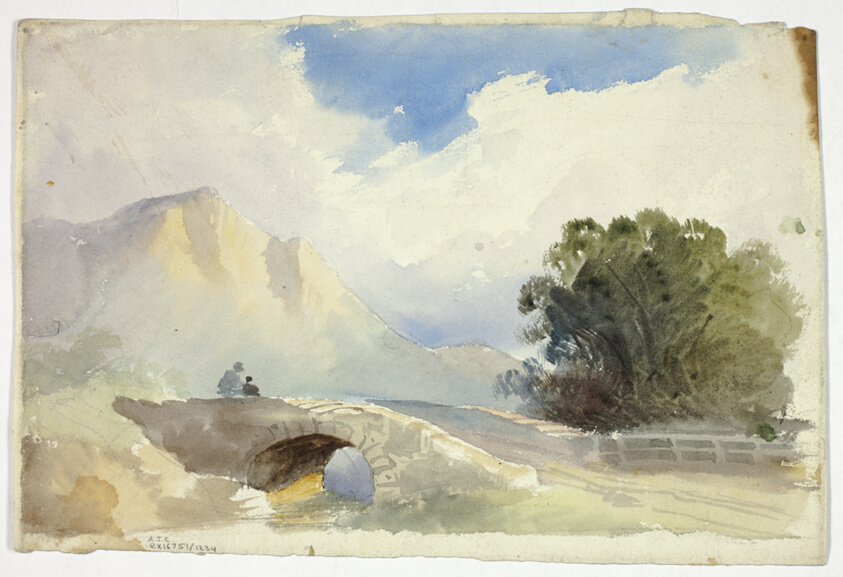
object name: Drawing and Watercolor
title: Domed Lookout on Wall in Mountain Landscape (recto); Figures Crossing Bridge before Mountain (verso)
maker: Unknown Artist; British, 19th century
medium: Watercolor over traces of black chalk (recto and verso), on ivory wove paper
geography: United Kingdom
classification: watercolor; drawings (visual works); prints and drawing